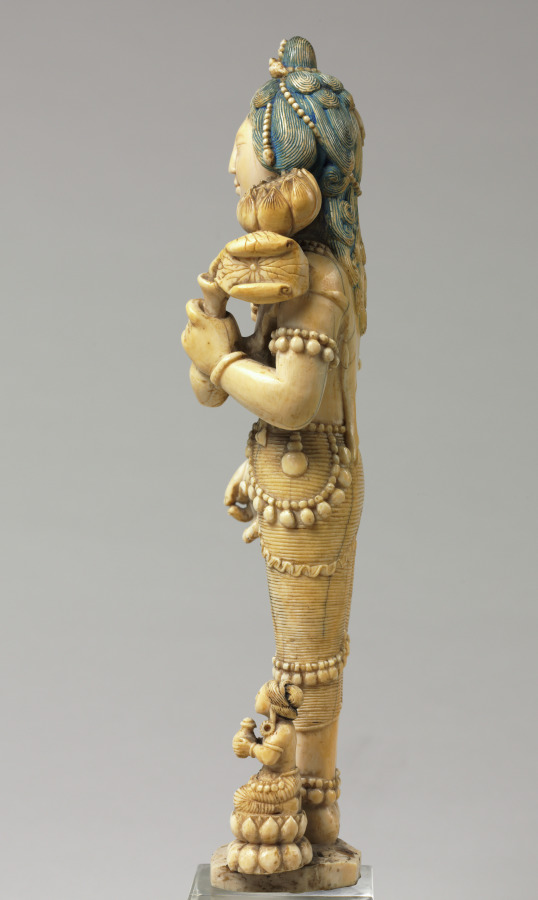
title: Bodhisattva of Compassion (Avalokiteshvara)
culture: Tibet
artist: Choying Dorje, the Tenth Black Hat Karmapa (Tibetan, 1604–1674)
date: 1647–48 or 1658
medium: ivory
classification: Ivory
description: Choying Dorje was one of the most influential monastic leaders in the history of Tibetan Buddhism. Known as the Tenth Karmapa, he was the head of the Karma Kagyu order of monks. His biographies state that from a young age he had a talent and passion for carving and painting images of bodhisattvas and other enlightened beings. Several of his original works survive, including this exceptionally rare ivory carving of Avalokiteshvara holding a lotus. Stylistically it is related to images from southwestern China, where he stayed in exile from 1647 to 1648 in the wake of Mongol invasions that destroyed many Kagyu monasteries in Tibet. While there he was exposed to Chinese art, which was favored by his patrons. The face has the distinctive elongation unique to Dorje's personal style. This sculpture could have been made during his time of exile or a decade later after his return to Tibet.